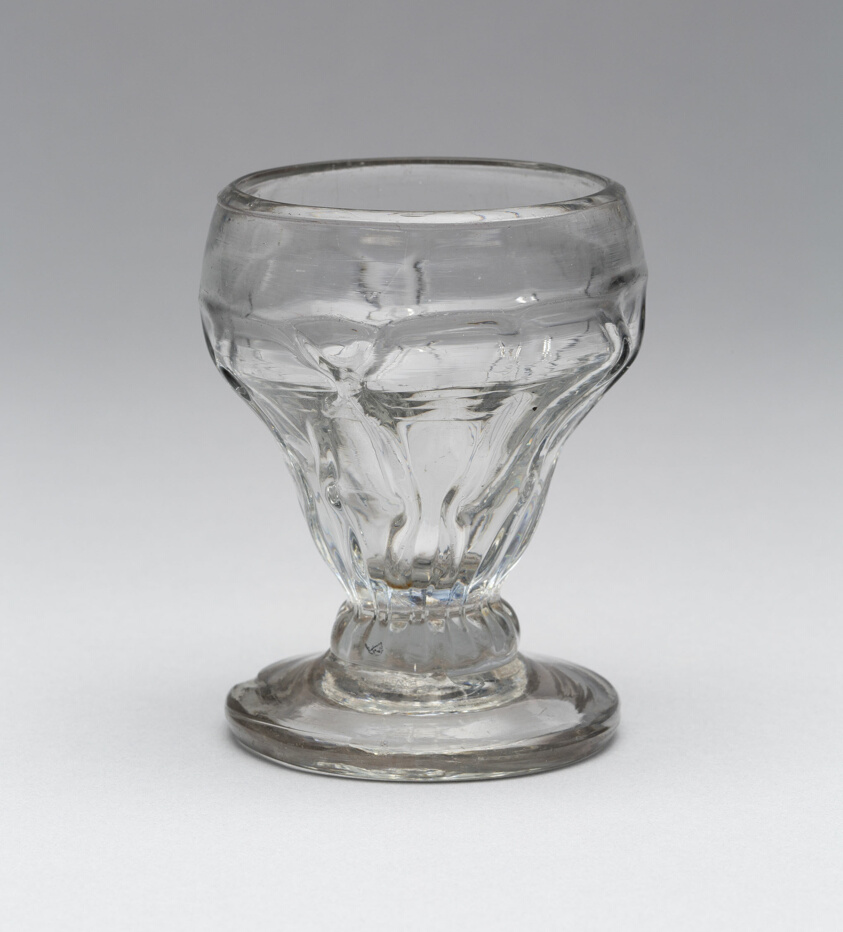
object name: Glass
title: Salt Dish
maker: Artist unknown (American, 18th–19th century)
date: 1790–1830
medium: Glass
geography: United States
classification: saltcellar; glass; dish (vessel); american decorative arts; american arts; decorative arts